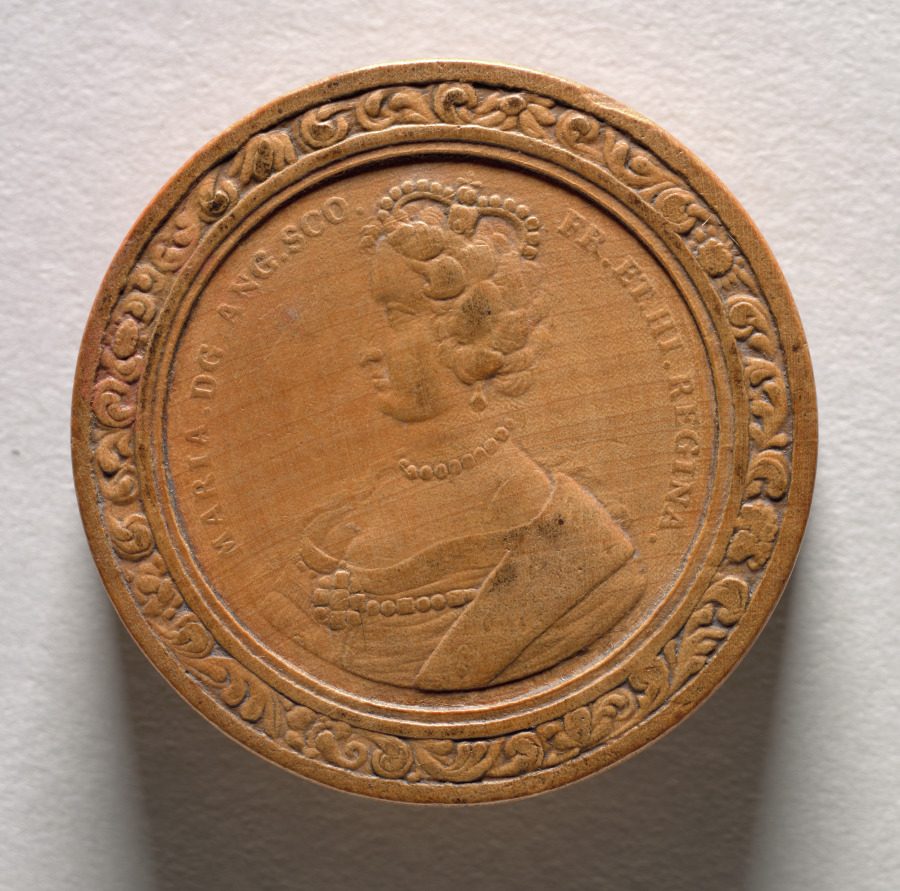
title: Gaming Piece (reverse)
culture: Germany, late 17th-early 18th Century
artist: Martin Brunner (German, 1659–1725)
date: c.1700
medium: wood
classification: Furniture and woodwork